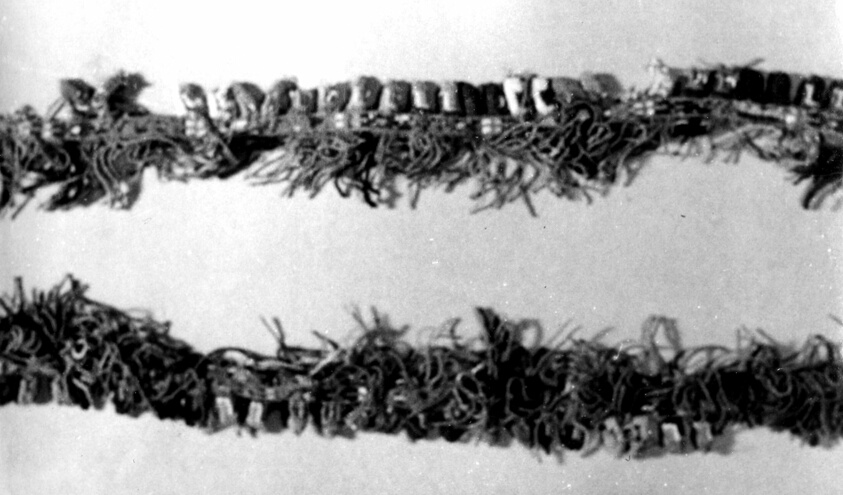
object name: Textile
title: Band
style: nazca, andean, andes, Pre-Columbian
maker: Nazca; Nazca Valley, south coast, Peru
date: 100 B.C./A.D. 200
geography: Peru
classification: textile; weaving